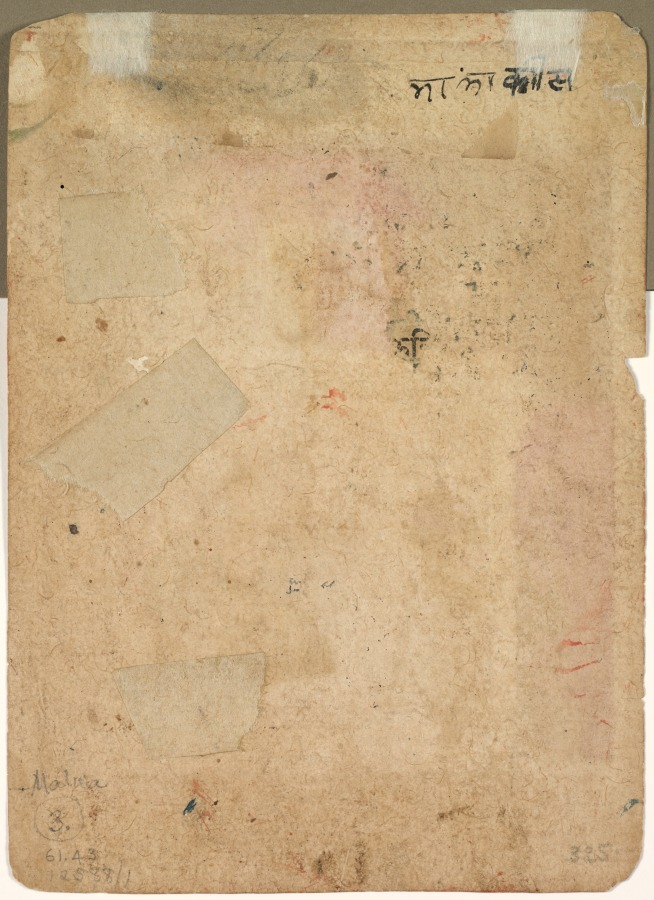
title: Pancham Raga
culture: Central India, Malwa, 17th century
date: c. 1660–80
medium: Gum tempera, ink, and gold on paper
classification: Painting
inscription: Inscription: "Pancham Raga-A lord with intense looks and a disturbed mind who has the chauri moving (behind him) gazes at the pleasure-seekirig woman."